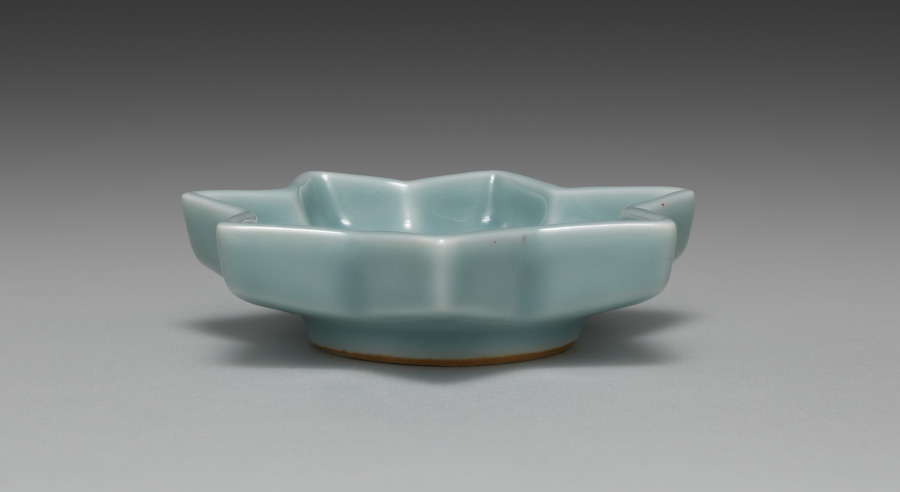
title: Saucer from Maple Leaf-Shaped Saucers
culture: Japan, Meiji period (1868–1912)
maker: Seifū Yohei III (Japanese, 1851–1914)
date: 1893–1914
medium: One of five dishes from a set of ten; porcelain with blue glaze and molded design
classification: Ceramic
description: These maple leaf–shaped saucers, like Yohei III's five shell saucers CMA 2022.188, have a long, horizontal box with a separate compartment for each piece. Now a set of five, these dishes were originally a set of ten, stored in two boxes of five each. From their housings, which accommodate differing numbers of objects, one can hypothesize that while some items created by the Seifu studio were intended to be acquired in larger sets, and thus were perhaps made to order, others, like these, may have been items to be purchased of the shelf in set quantities that allowed clients flexibility in scale. The box for these five saucers describes them as “heavenly blue[–glazed] porcelain” (tenseiji). The veins of the leaves are slightly raised in the clay so that the glaze pools around them and they stand out as white where the glaze thins. There are longer lines at the points of the leaves and shorter ones following the wall of each indentation so that the design has both a horizontal and a subtle vertical dimension.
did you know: These saucers shaped like maple leaves show Seifū Yohei III’s “heavenly blue glaze.”